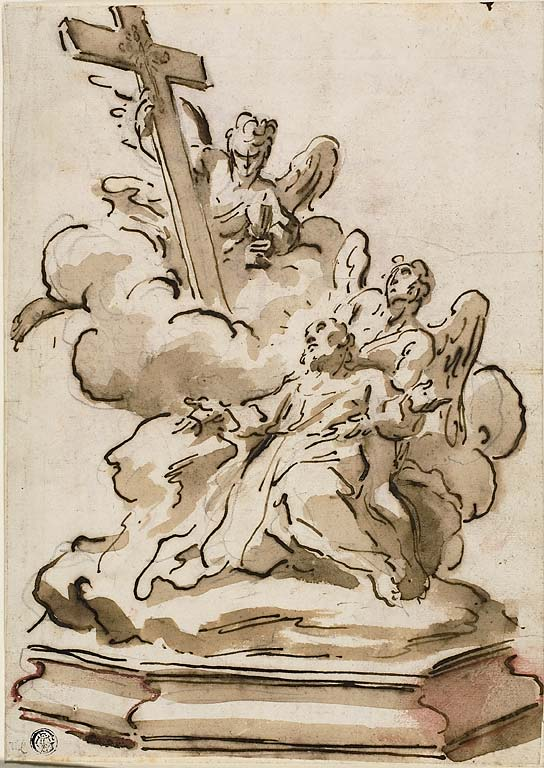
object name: Drawing and Watercolor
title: Sculpture of a Saint (St Peter's Vision of the Cross?)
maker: Unknown artist; possibly Giovanni Segala (Italian, 1663-1720)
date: c. 1650-1750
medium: Pen and brown ink, with brush and brown wash, over black chalk, with touches of brush and red gouache, on ivory laid paper, laid down on ivory laid paper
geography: Italy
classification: pen and ink drawings; paper; drawings (visual works); prints and drawing